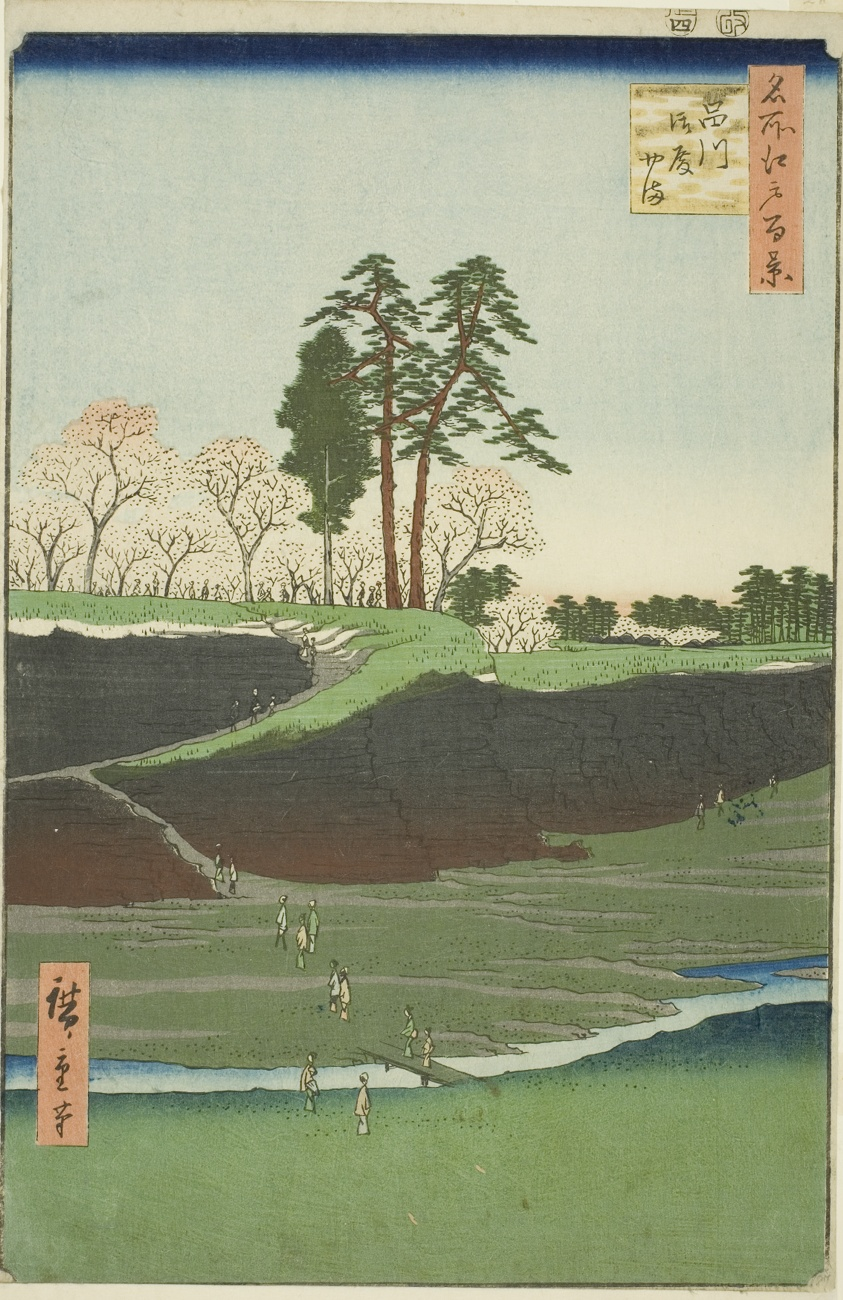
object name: Print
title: Goten Hill at Shinagawa (Shinagawa Gotenyama), from the series "One Hundred Famous Views of Edo (Meisho Edo hyakkei)"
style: Japanese (culture or style)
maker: Utagawa Hiroshige 歌川 広重; Japanese, 1797-1858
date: 1856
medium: Color woodblock print; oban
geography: Japan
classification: woodblock print; print; asian art